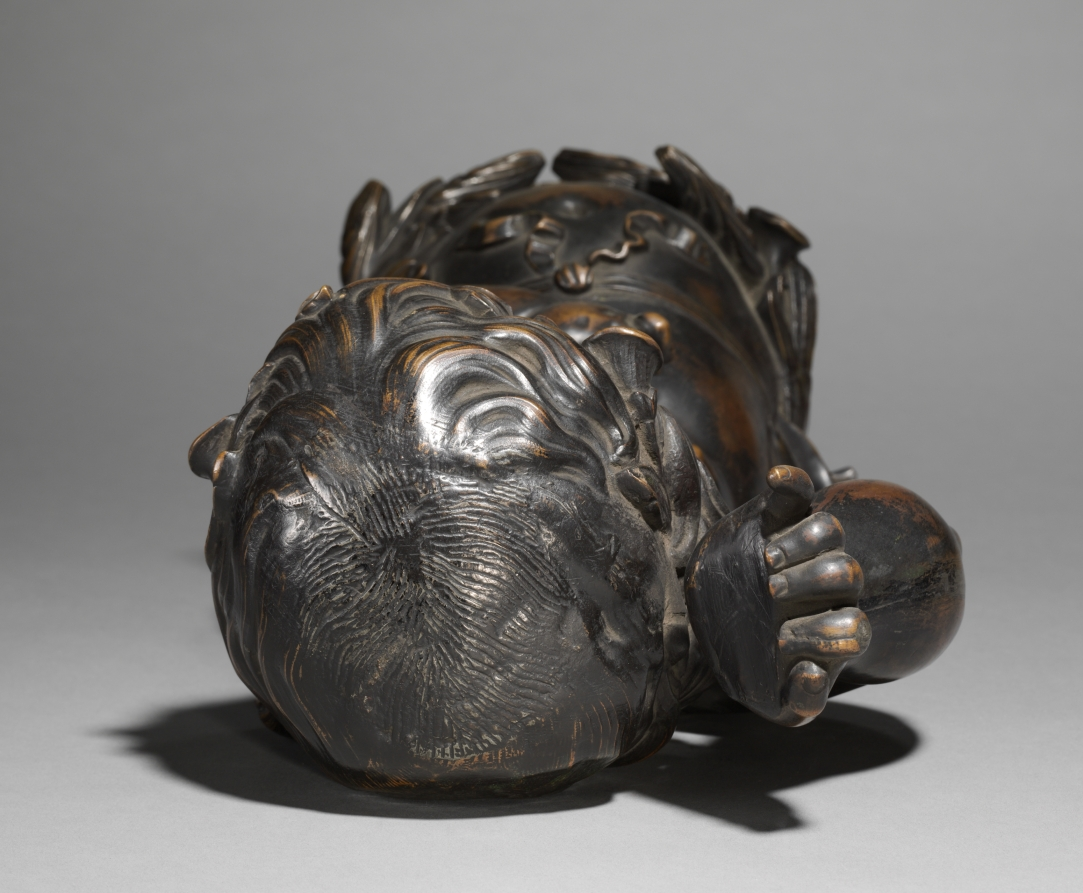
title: Autumn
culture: France, 19th century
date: 1800s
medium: bronze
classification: Sculpture